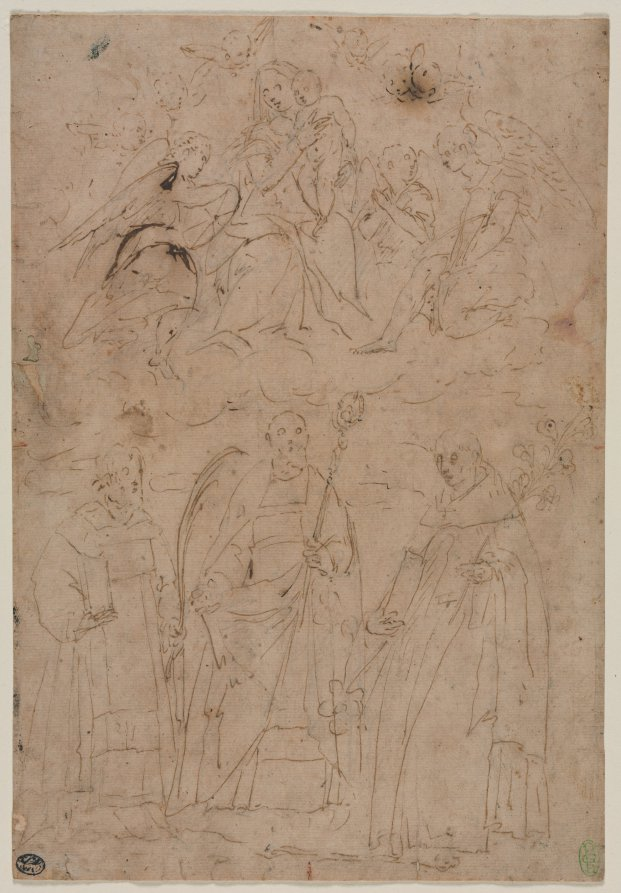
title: Madonna and Child in Glory above Three Saints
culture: Italy, 16th century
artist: Giovanni Battista Paggi (Italian, 1554–1627)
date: c. 1570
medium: pen and brown ink (iron gall) over black chalk(?)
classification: Drawing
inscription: lower right, in black ink (on tab of paper attached from verso): 11 ; VERSO OF SECONDARY SUPPORT, upper left, in graphite: GO/ - L ; center, in graphite: c+o [in ligature] ; lower right, in graphite: TEAUM ; lower right, in graphite: K1931 ; lower right, in purple pencil and graphite: £ 30 ; lower right, in graphite: 42